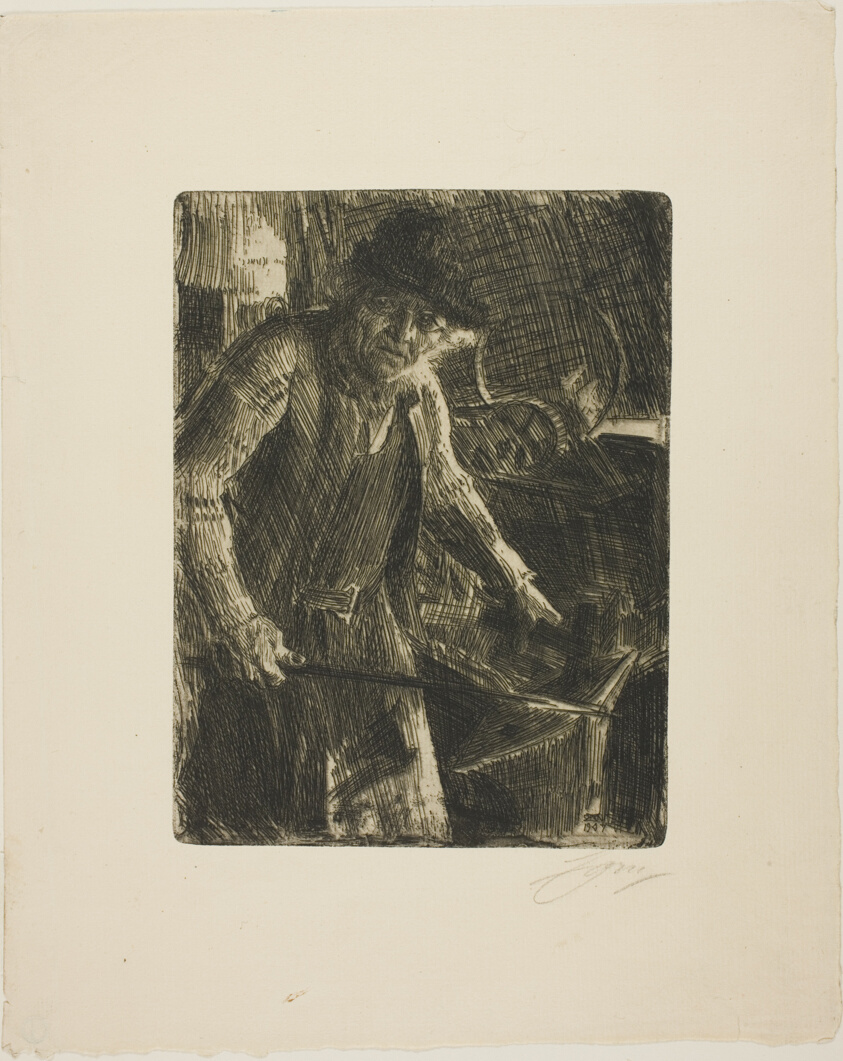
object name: Print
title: The Master-Smith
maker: Anders Zorn (Swedish, 1860-1920)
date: 1907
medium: Etching on ivory laid paper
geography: Sweden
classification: etching; print; prints and drawing